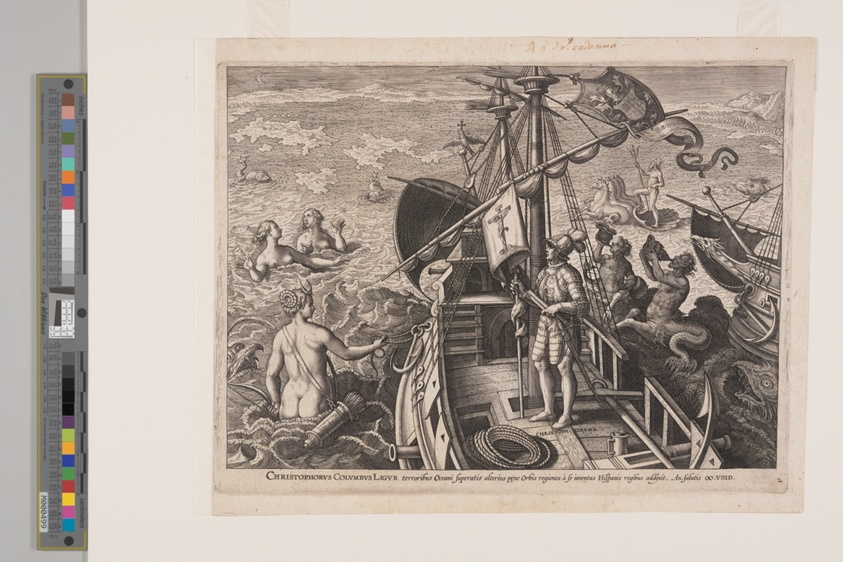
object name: Print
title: Christopher Columbus on His Ship, from Americae Retectio (The Discovery of America)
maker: Adriaen Collaert (Flemish, c. 1560–1618); after Jan van der Straet (Flemish 1523–1605)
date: c. 1589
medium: Engraving on ivory laid paper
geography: Flanders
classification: engraving; paper; print; prints and drawing